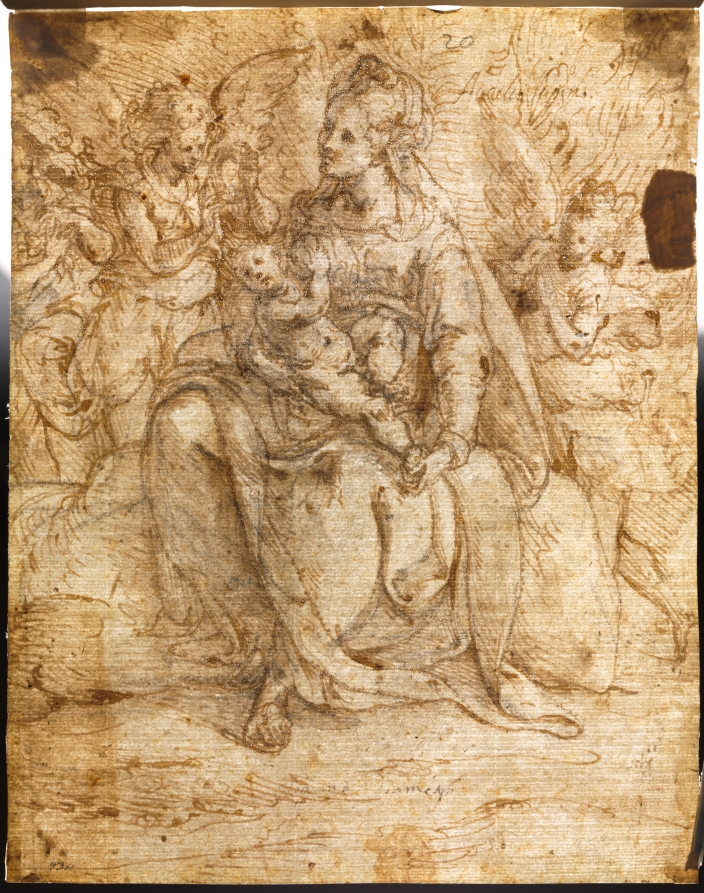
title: Madonna and Child with Angels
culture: Italy, 16th century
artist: Aurelio Luini (Italian, 1530–1593)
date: late 1500s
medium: pen and brown ink and brush and brown wash over black chalk (extended with brush and water in places); pricked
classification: Drawing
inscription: upper left, in black ink: 183: ; lower right, in black ink: Luino ; VERSO, upper right, in brown ink: Aurelio Lupin. ; lower center, in brown ink: Gio ane Fiamig[r?]o ; lower left, in black ink: 9311. ; upper center, in graphite: 20 ; throughout center, in graphite: [illegible] ; lower center, in graphite: G[illegible] [erased] / G[illegible] [erased] ? ; lower right, in graphite: 85[7?]